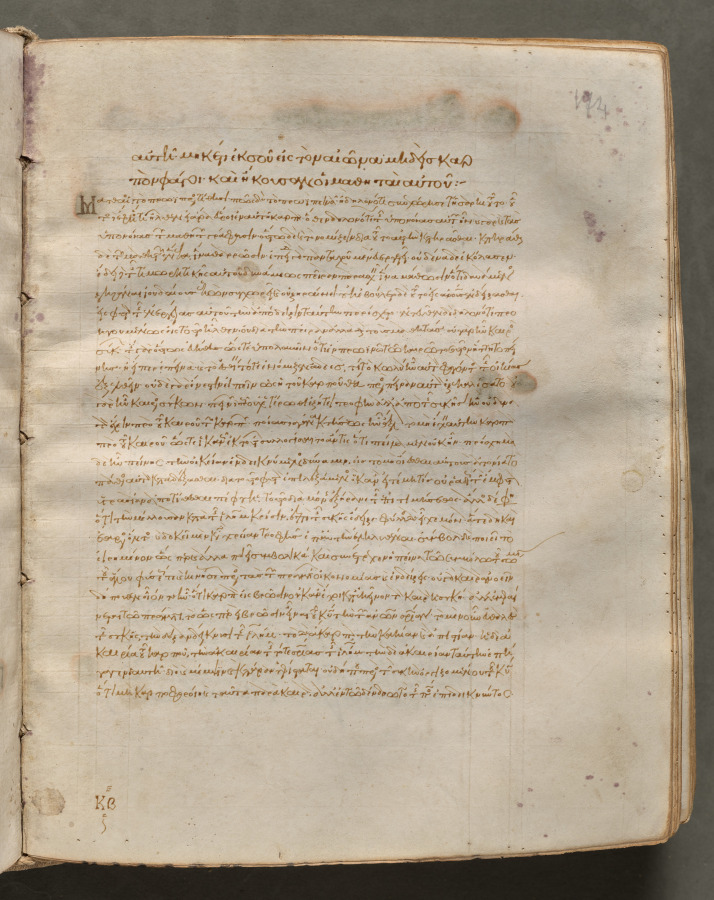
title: Text, folio 174 (recto), from a Gospel Book with Commentaries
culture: Byzantium, Constantinople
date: c. 1000–1100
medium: ink, tempera, and gold on vellum; leather binding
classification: Bound Volume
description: Each of the four gospels in this book opens on a page with brilliantly illuminated borders depicting the author of the text as well as birds-principally peacocks, symbols of the immortality of the soul-and fountains, representing the fountain of life and the salvation of the soul. This volume consists of 428 leaves with texts in Greek. Its level of sophistication suggests that it was probably written and decorated in a monastery in Constantinople.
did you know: Gospel Books were carried in procession through Byzantine churches.